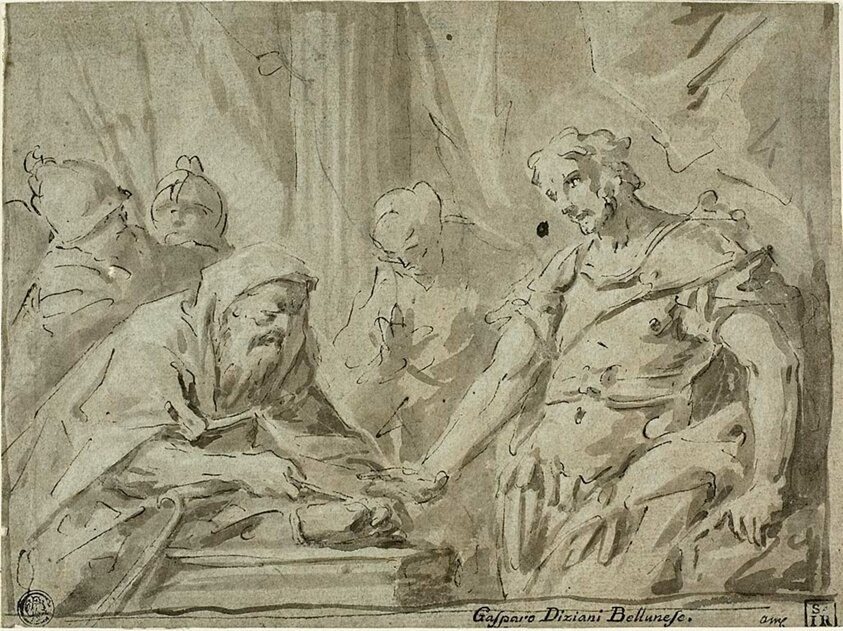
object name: Drawing and Watercolor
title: David Receiving the Hallowed Bread from Alchimelek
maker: Gaspare Diziani (Italian, 1689-1767)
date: 1725/34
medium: Pen and brown ink with brush and brown wash, with traces of black chalk, heightened with white chalk, on blue-gray laid paper, laid down on ivory laid paper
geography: Italy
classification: ink or chalk wash; drawings (visual works); prints and drawing